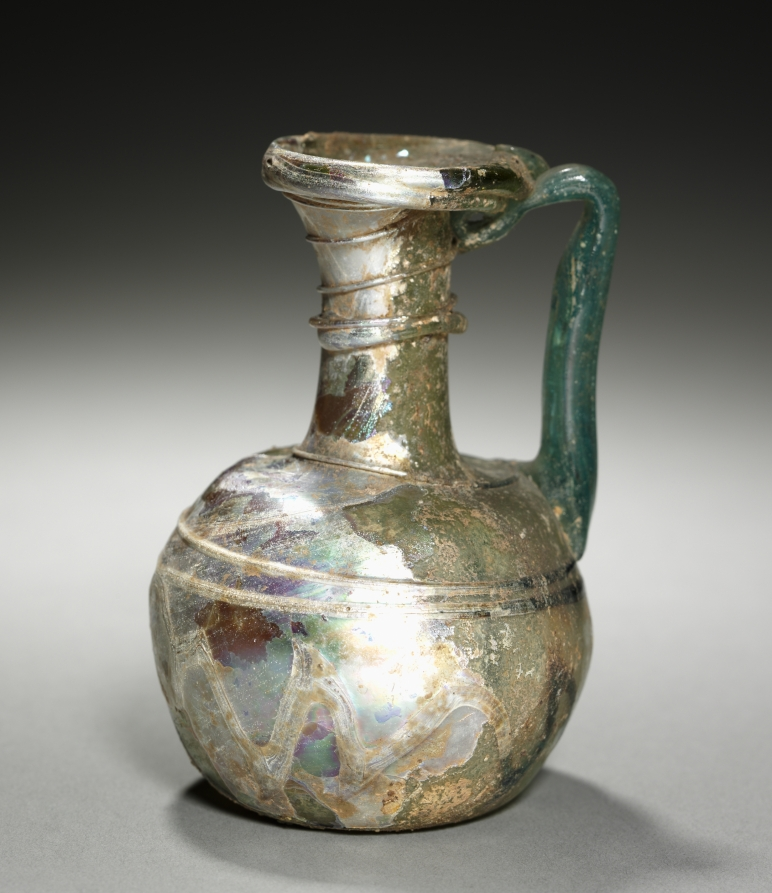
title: Squat Juglet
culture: Italy, Roman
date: 300–500 CE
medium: green glass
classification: Glass